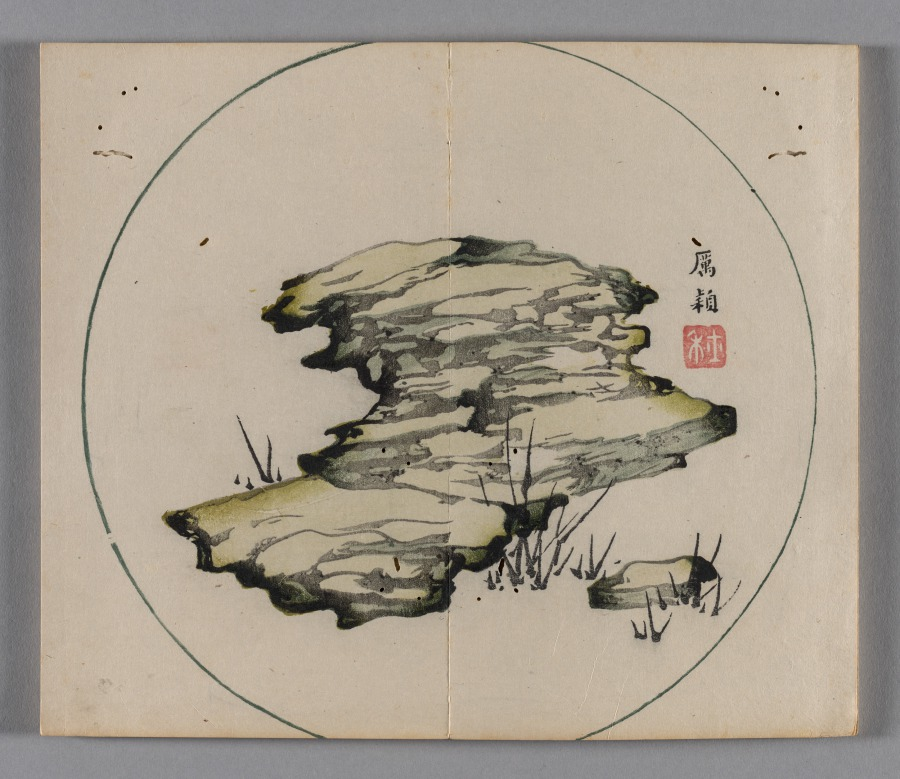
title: Ten Bamboo Studio Painting and Calligraphy Handbook (Shizhuzhai shuhua pu): Round Fans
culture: China, Qing dynasty (1644-1911)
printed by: Hu Zhengyan (Chinese, c. 1584–1674)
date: 1633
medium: Woodblock-printed book; ink and colors on paper; first edition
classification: Print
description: Color printing reached a level of perfection in the early 1600s, as seen in this Ten Bamboo Studio Collection of Calligraphy and Painting and the Mustard Seed Garden Manual of Painting (printed 1679 and 1701). The painterly quality, precision in registering (aligning) the woodblocks, and harmonious colors made them the most successful color print editions in Chinese history. Both editions were printed and compiled in Nanjing, spread nationwide, and had a great impact on the arts in Japan and Korea.